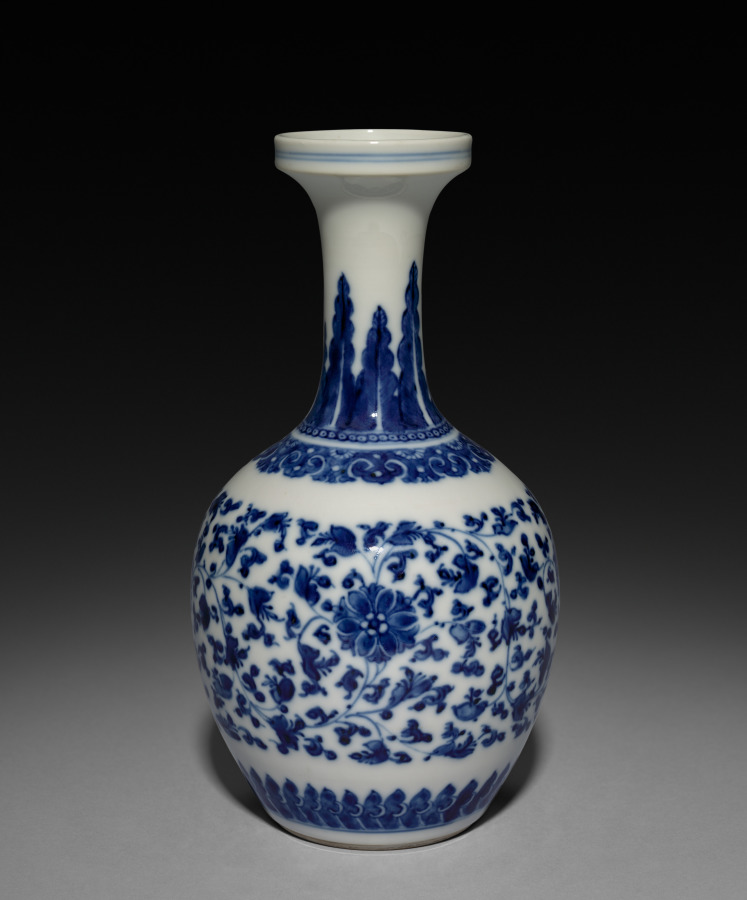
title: Globular Vase with Long Neck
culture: China, Qing dynasty (1644-1911), Kangxi reign (1661-1722)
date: 1661–1722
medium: porcelain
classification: Ceramic